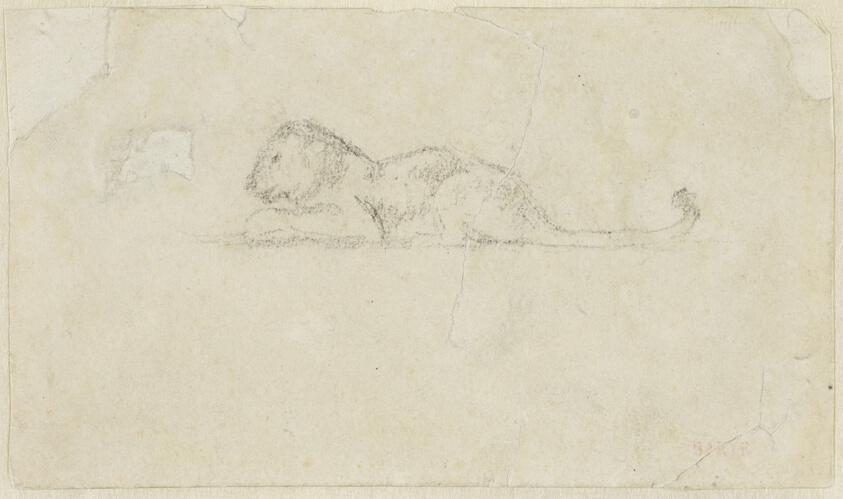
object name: Drawing and Watercolor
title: Seated Lioness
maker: Antoine Louis Barye (French, 1795-1875)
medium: Graphite on ivory wove paper, laid down on ivory wove paper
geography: France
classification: graphite; drawings (visual works); prints and drawing